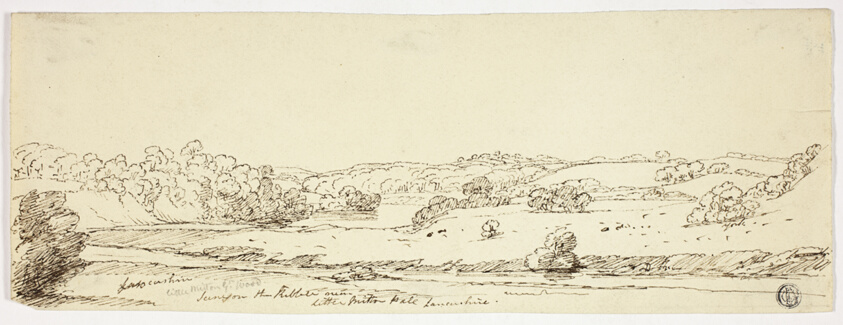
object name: Drawing and Watercolor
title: Scenes on the Kibble near Little Milton Hall, Lancashire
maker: Joseph Mallord William Turner (English, 1775-1851)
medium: Pen and brown ink, over touches of graphite, on cream wove paper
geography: England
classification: pen and ink drawings; drawings (visual works); prints and drawing